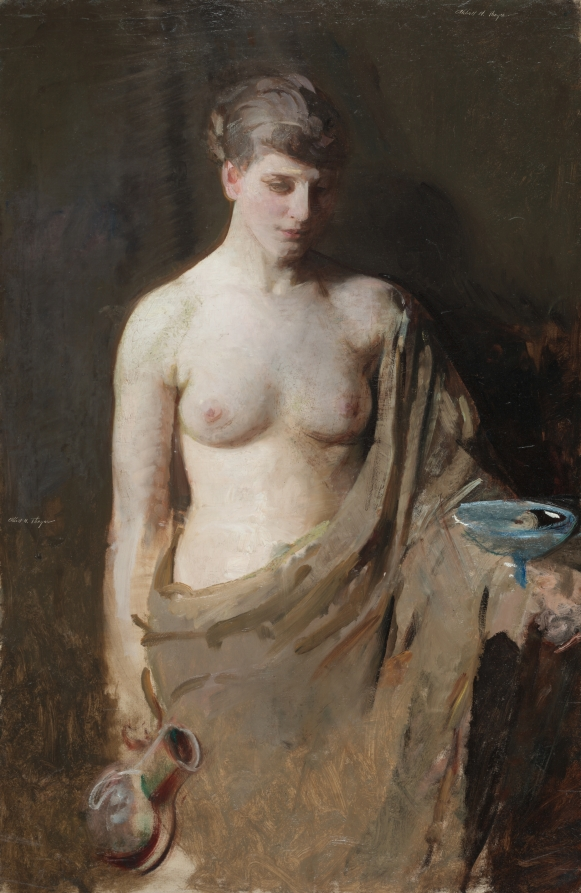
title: Hebe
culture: America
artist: Abbott Handerson Thayer (American, 1849–1921)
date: c. 1890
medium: oil on canvas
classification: Painting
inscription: Signed left and upper right: "Abbott H. Thayer"